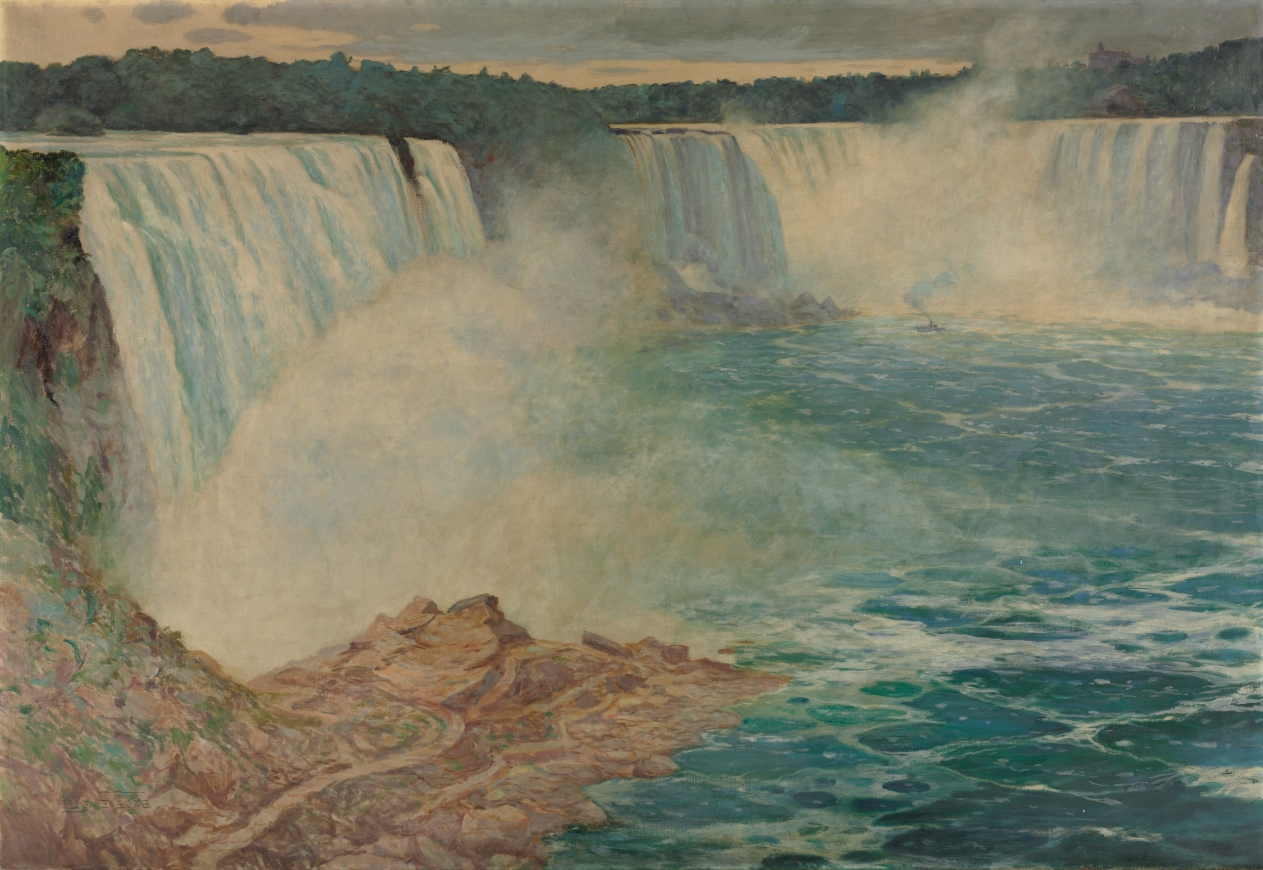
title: Niagara Falls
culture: America, Ohio, Cleveland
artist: Augustin Satra (American, 1877–1909)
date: c. 1906–1909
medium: oil on canvas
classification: Painting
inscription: Signed lower left: "Aug. Satra"